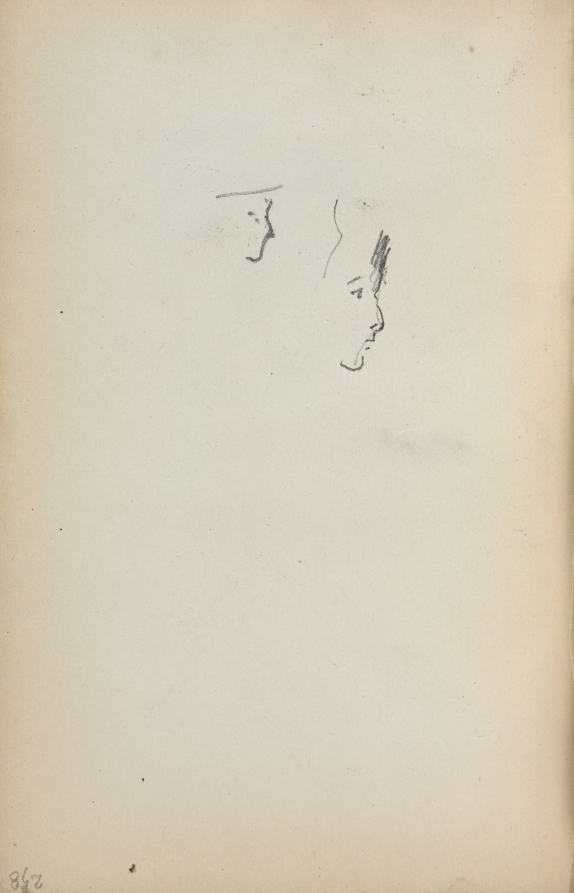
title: Italian Sketchbook: Two Profiles (page 258)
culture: America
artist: Maurice Prendergast (American, born Newfoundland [now Canada], 1858–1924)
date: 1898–1899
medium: pencil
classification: Bound Volume